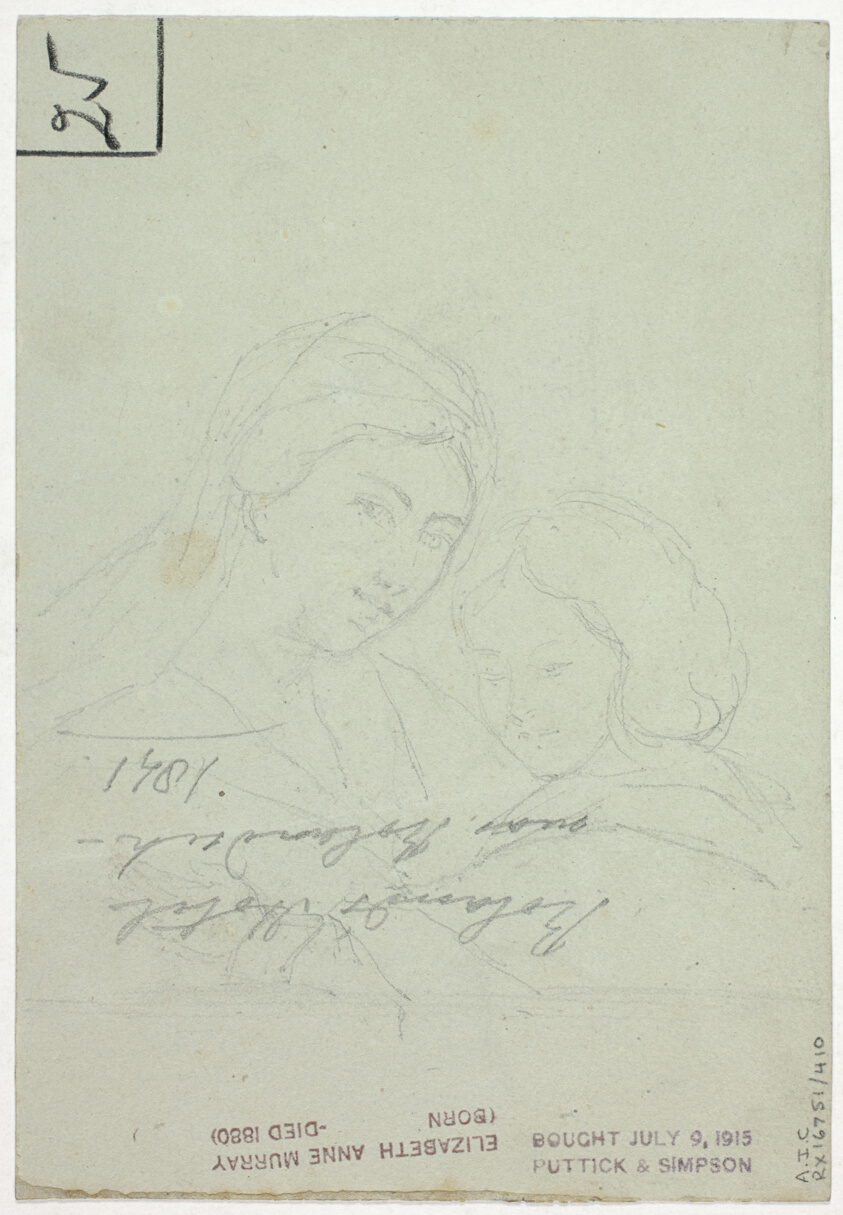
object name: Drawing and Watercolor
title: On the Rhine (recto), and Mother and Child (verso)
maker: Elizabeth Murray (English, c. 1815-1882)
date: 1841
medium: Brush and brown and gray wash, heightened with white gouache, over graphite (recto), and graphite (verso), on blue wove paper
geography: England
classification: ink or chalk wash; drawings (visual works); prints and drawing